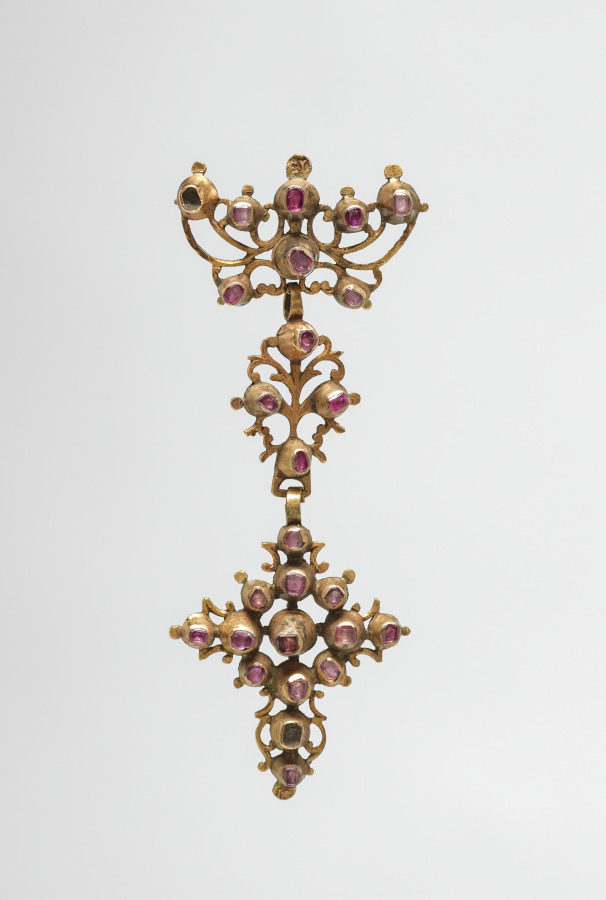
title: Woman's Costume (Pendant)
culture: Italy, 19th century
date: 1800s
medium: gold and jewels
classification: Jewelry